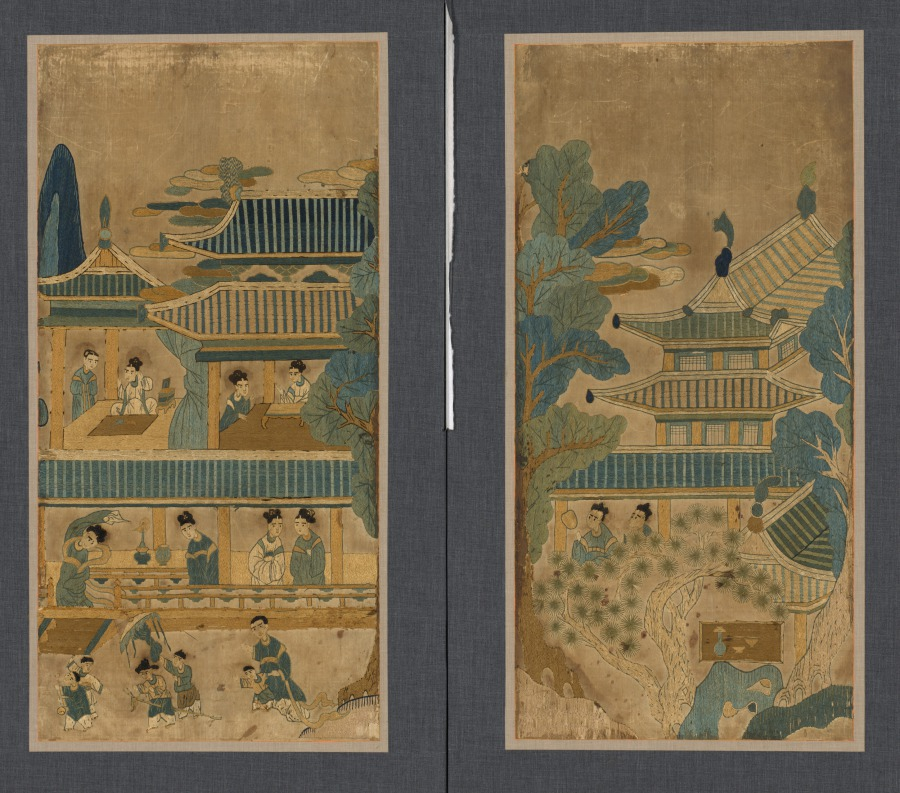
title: General Guo Ziyi’s Birthday Banquet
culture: Korea, Joseon dynasty (1392–1910)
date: early or mid-1800s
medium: Eight-panel folding screen, embroidery on silk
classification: Textile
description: The subject of this folding screen is a banquet in honor of Guo Ziyi (697–781), who is considered one of the greatest generals in Chinese history. He had a long and successful military career as well as a blissful family life. Thus, his image surrounded by his numerous family members symbolize the paragon of success and happiness. Using a wide spectrum of colorful silk threads, the artist colorfully depicts Guo enjoying his full-fledged retirement life.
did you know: This folding screen is highly likely to have been created by an amateur woman embroiderer.